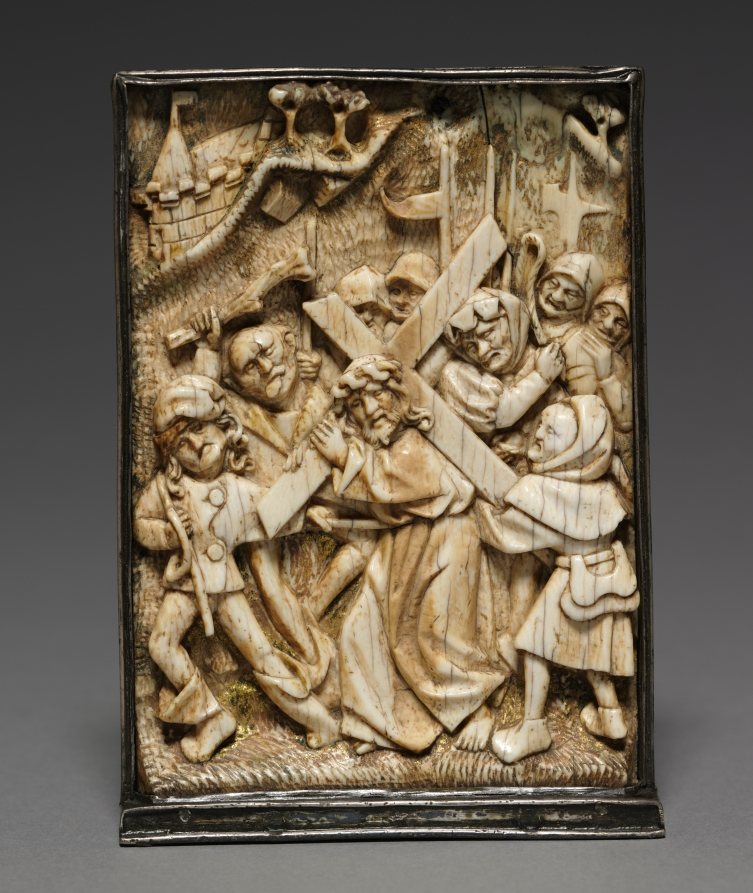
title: Plaque: Christ Carrying the Cross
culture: Germany, Lower Rhine, late 15th Century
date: c. 1480–1500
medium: ivory with traces of color and gold, mounted in silver frame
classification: Ivory